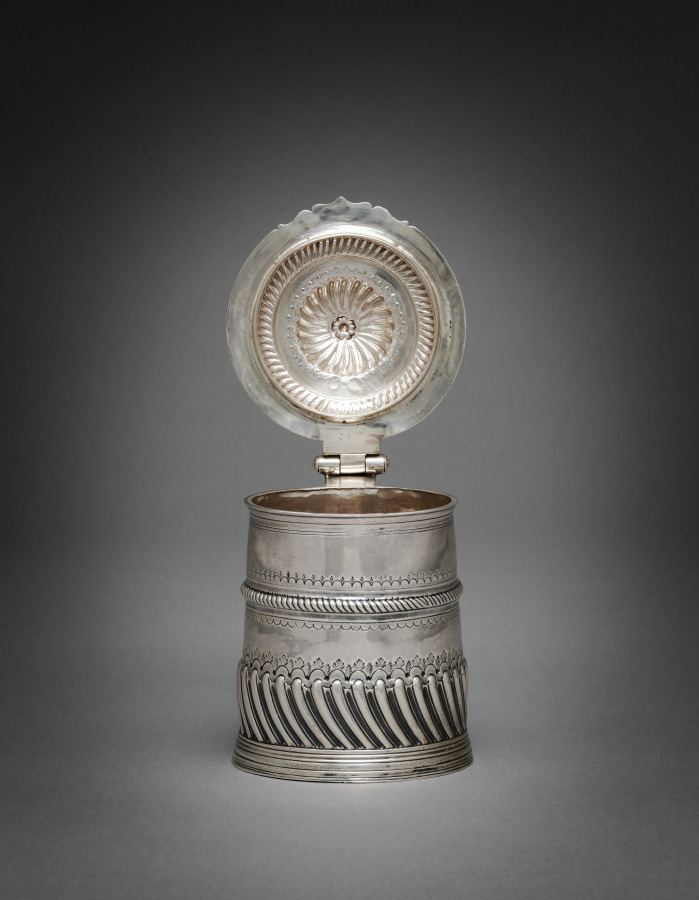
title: Tankard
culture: England, London, early 18th Century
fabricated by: Thomas I Parr (British)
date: 1701–1702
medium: silver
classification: Silver